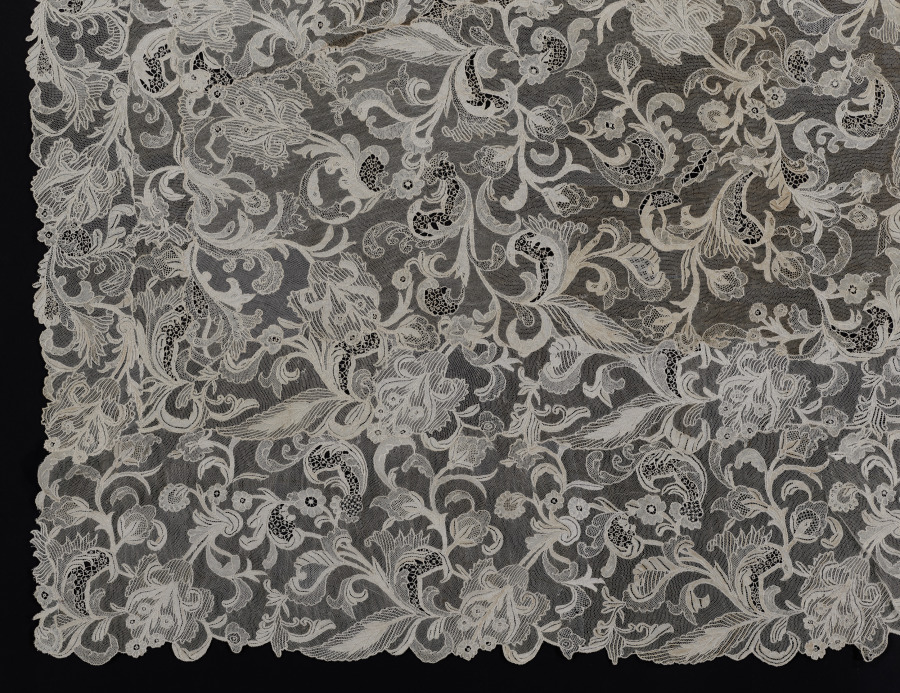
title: Lace Cloth or Square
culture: Italy, Burano(?), 1700s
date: 1700s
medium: Needle lace (Burano Point)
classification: Lace